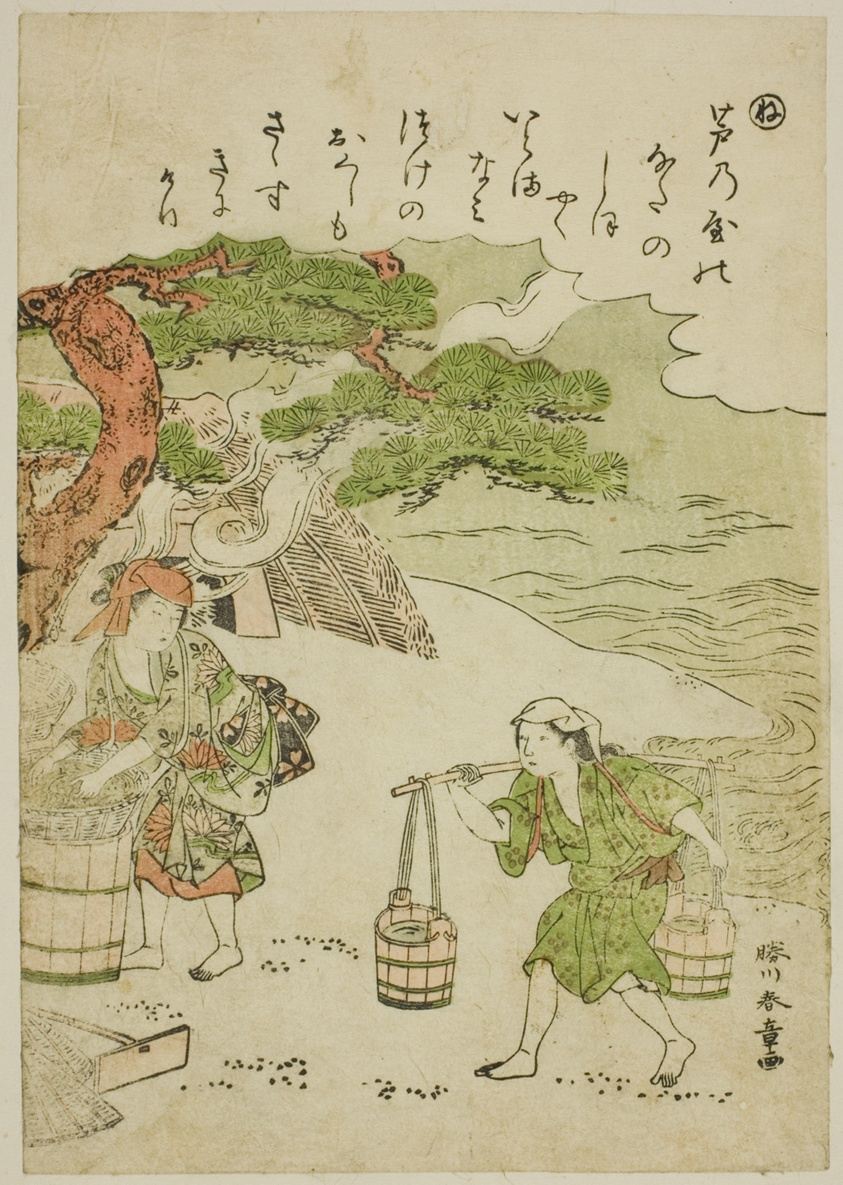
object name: Print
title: "Ne": Brine Carriers, from the series "Tales of Ise in Fashionable Brocade Pictures (Furyu nishiki-e Ise monogatari)"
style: Japanese (culture or style)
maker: Katsukawa Shunsho 勝川 春章; Japanese, 1726-1792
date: c. 1772/73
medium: Color woodblock print; koban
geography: Japan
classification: woodblock print; print; asian art